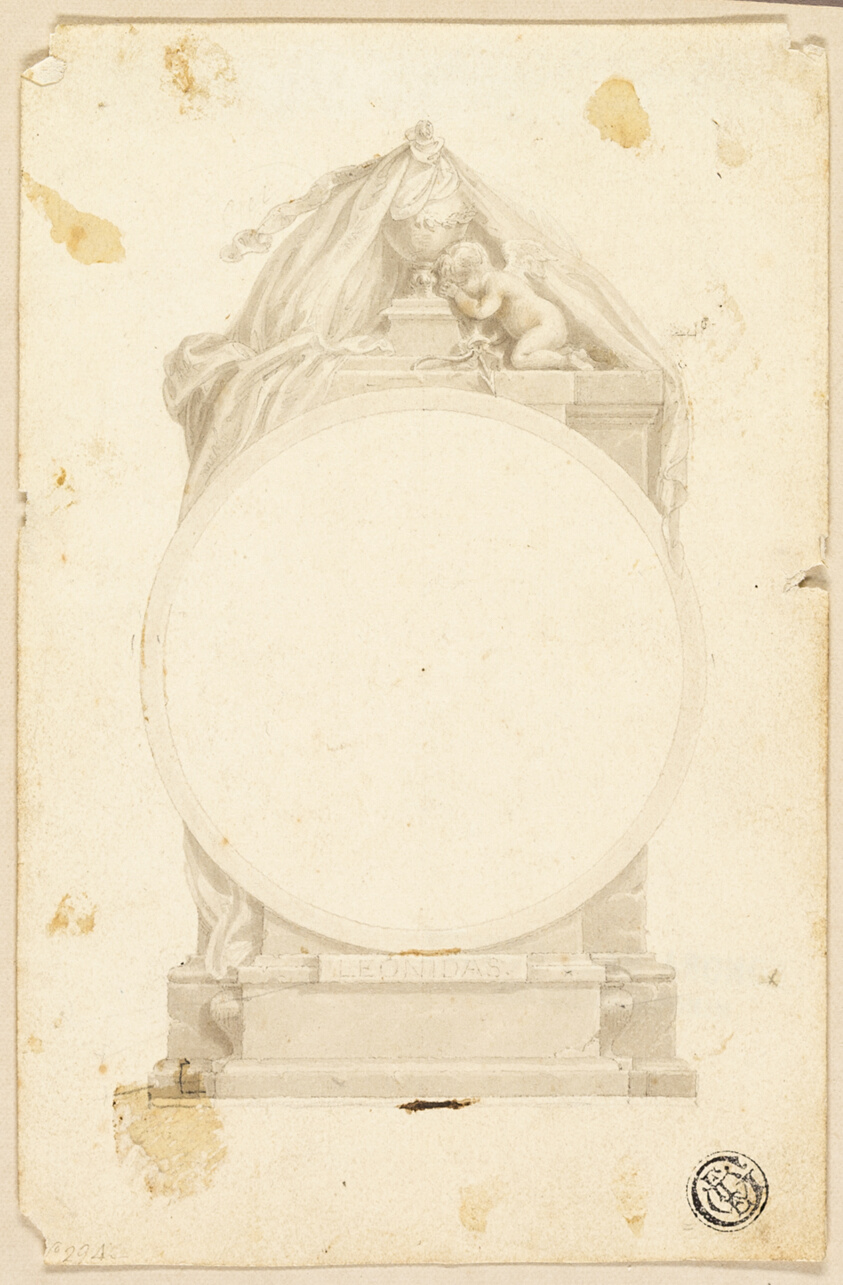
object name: Drawing and Watercolor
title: Funerary Monument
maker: Possibly Thomas Stothard (English, 1755-1834); or Richard Cosway, R.A. (English, 1742-1821); or Edward Francis Burney (English, 1760-1848); or Charles Alfred Stothard (English, 1786-1821)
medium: Pen and gray ink with brush and gray wash, over graphite, on cream wove paper, tipped onto board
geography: England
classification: ink or chalk wash; drawings (visual works); prints and drawing